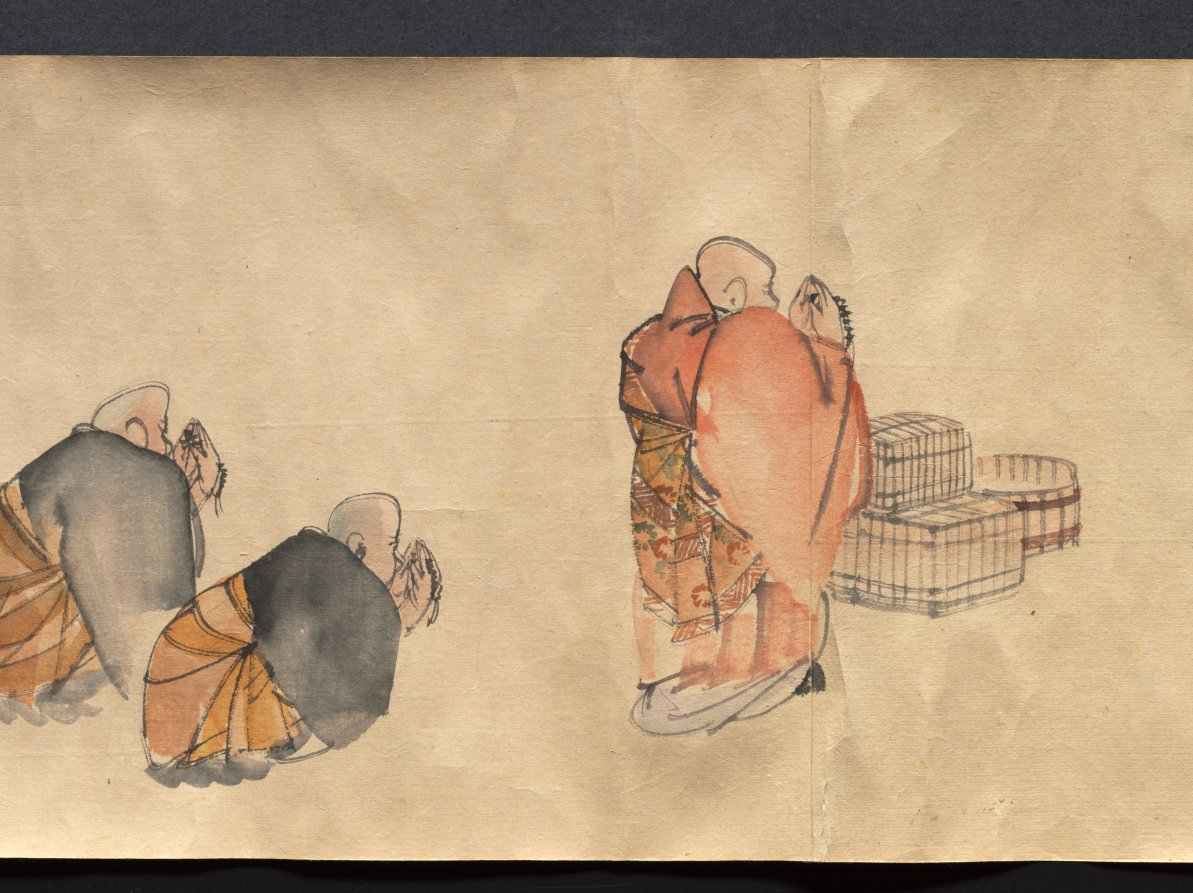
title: Festival Scenes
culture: Japan, Edo period (1615–1868)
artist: Suzuki Nanrei (Japanese, 1775–1844)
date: c. 1795–1844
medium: handscroll; ink and color on paper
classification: Painting